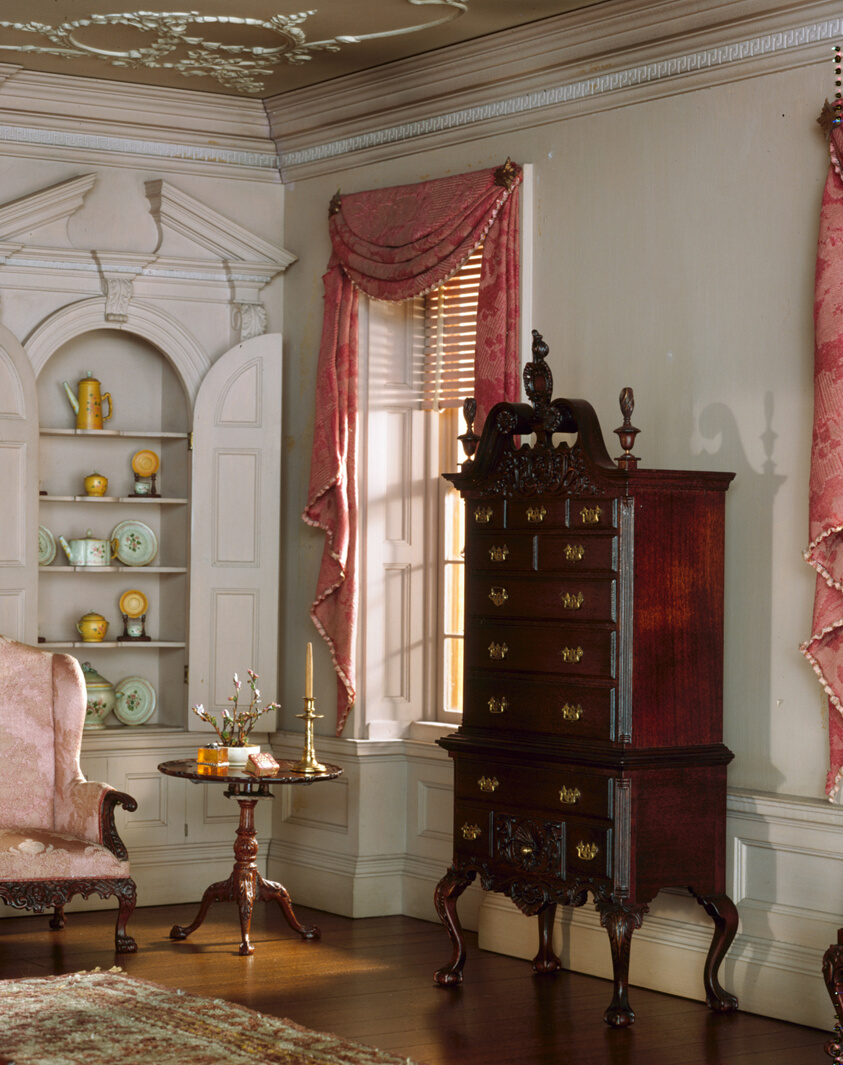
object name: Miniature room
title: A16: Pennsylvania Drawing Room, 1761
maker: Designed by Narcissa Niblack Thorne; American, 1882-1966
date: c. 1940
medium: Miniature room, mixed media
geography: United States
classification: miniature; thorne rooms